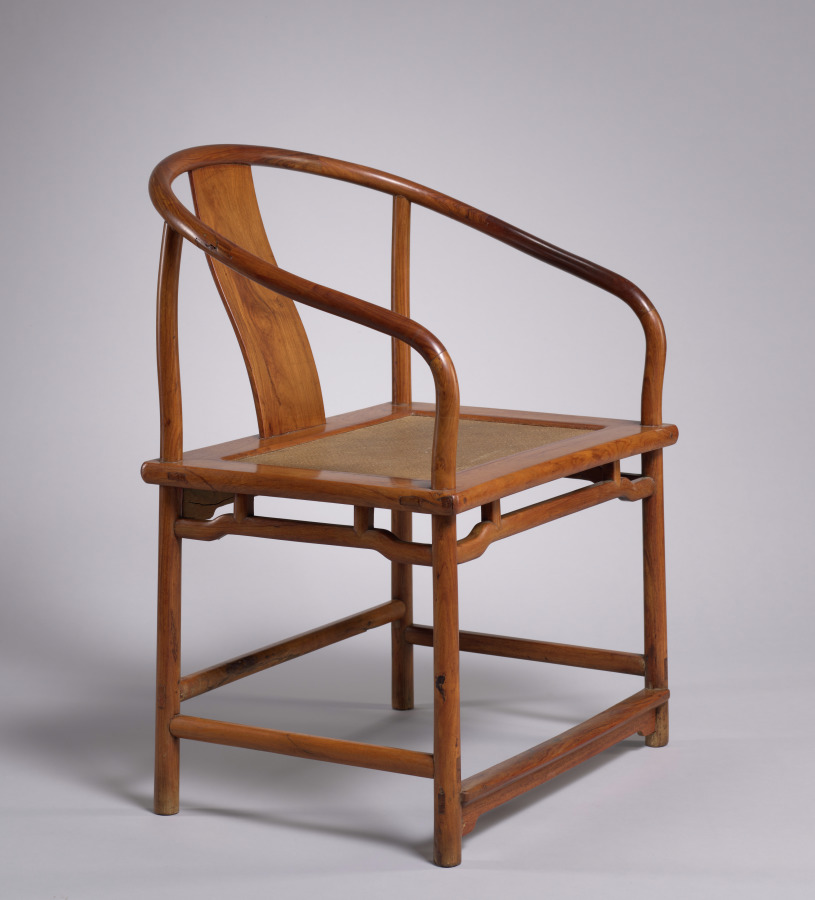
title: Roundback Armchair: Lohan Type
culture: China, Jiangsu province, Ming dynasty (1368–1644) or Qing dynasty (1644–1911)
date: 1600s–1700s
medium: Rosewood (huanghuali)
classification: Furniture and woodwork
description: In history, China moved from an original floor culture to high chairs and tables, developing a unique tradition of craftsmanship. Although still relatively unexplored, the manufacturing and styles of furniture differ by region. This horseshoe-back armchair was made in Jiangsu province. Its simplicity and minimalist elegance is characteristic of Suzhou-style furniture and aesthetics. The back of the chair is made of seven pieces of wood, joined and secured with an inserted wooden pin, a mortise-tenon technique that appeared in its earliest form in Neolithic fragments of the Hemudu culture.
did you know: Similar chairs with low, straight backs were presumably used by women or in a less formal context.